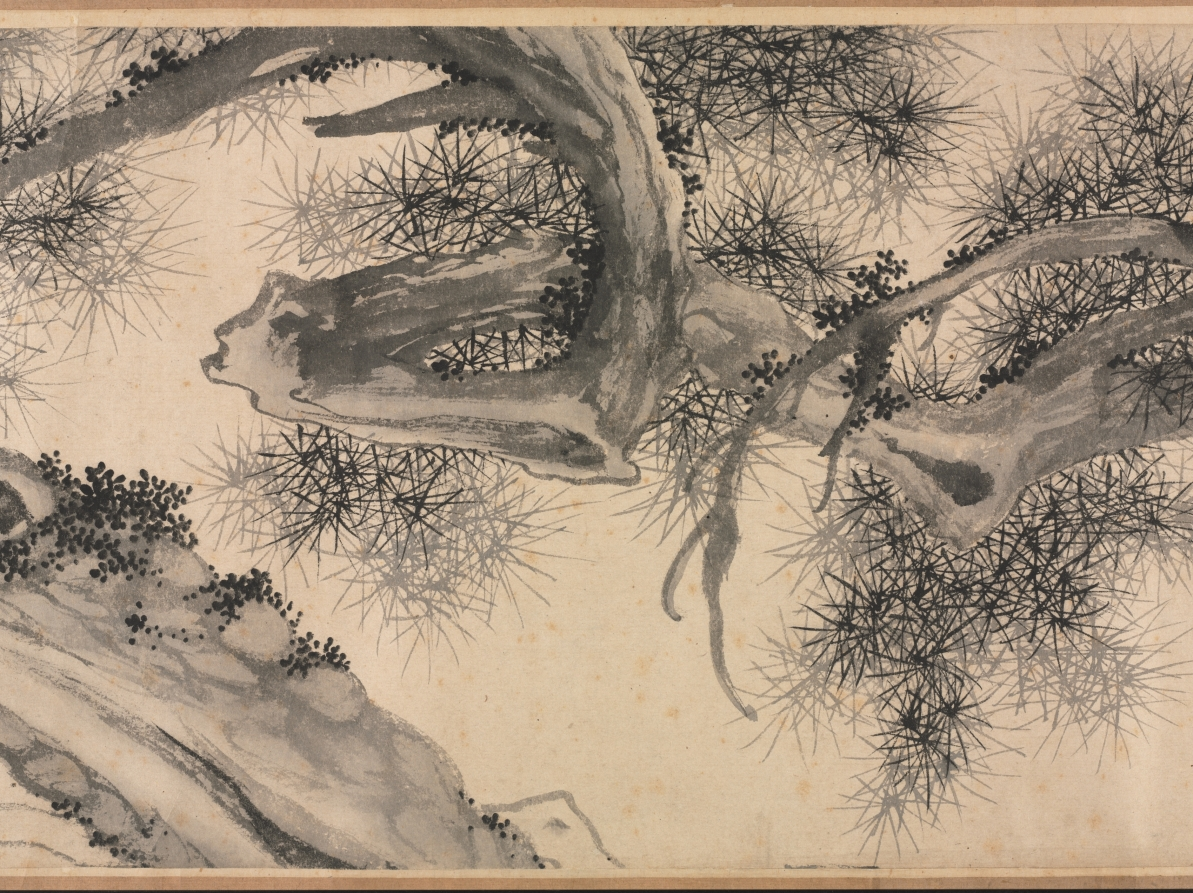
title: Old Pine Tree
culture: China, Ming dynasty (1368–1644)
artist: Wen Zhengming (Chinese, 1470–1559)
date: late 1530s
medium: handscroll; ink on paper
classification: Painting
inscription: 變化勢難縛，虬髯似戟森. 徵明 [印]文徵明印; 衡山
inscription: 2 partial seals of Qian Shisheng 錢士昇 (1575–1652)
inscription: 8 imperial seals: 6 of the Qianlong emperor (r. 1736–95); 1 of the Jiaqing emperor (r. 1796–1821); 1 of the Xuantong emperor (r. 1909–11).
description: Here the natural appearance of a gnarled and vine-entangled pine has been transformed into a rhythmic abstraction of brushstrokes and ink tonalities, with unifying opposites—opening and closing, rising and falling—that provide the design across the horizontal scroll. The artist's inscription reads: "The force of change beyond restraint; / The dragon's whiskers are likened to a forest of spears."